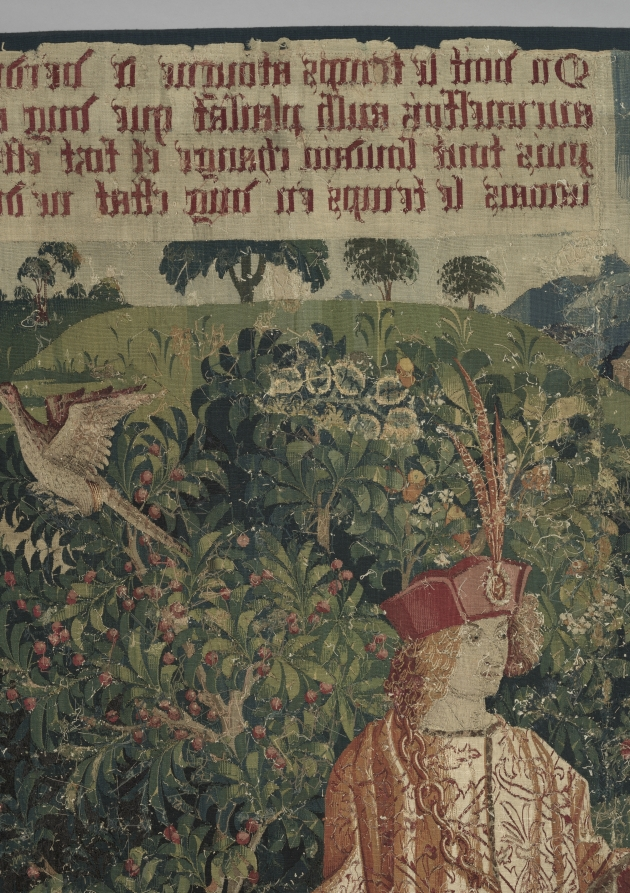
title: Time (from Chateau de Chaumont set)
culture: France, Lyon(?), early 16th century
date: 1512–15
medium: silk and wool; tapestry weave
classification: Tapestry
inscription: French verse in Gothic letters translates as follows: "One sees the weather adorned in green, Sometimes as pleasing as an angel; To suddenly change and be quite strange, The weather never stays the same."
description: Pierre Sala, who likely commissioned the set, is portrayed as the richly attired central figure offering a bouquet, a symbol of knowledge, to Éléonore, his daughter. Éléonore is pregnant, revealed by her upturned skirt and the persimmon in her husband Hector’s hand. Hector’s mother, Marguerite, in dark attire, will wed the widowed Sala in 1519. They appear in front of the royal chateau of Blois. The figures at the right convey Sala’s advice to his children. Time (the old man with the staff) with Clio, the Muse of History, standing on his shoulders, is being attacked by a Herculean youth wielding a stick. With this allegory, Sala is explaining that youth is ignorant of the complexities of life and time. The small unicorn at the far right represents the soul. The verse in Old French at the top refers to changing time: One sees Time adorned with green foliage, Sometimes as pleasant as an angel, Then suddenly change and become quite strange. Never does Time persist in one state.